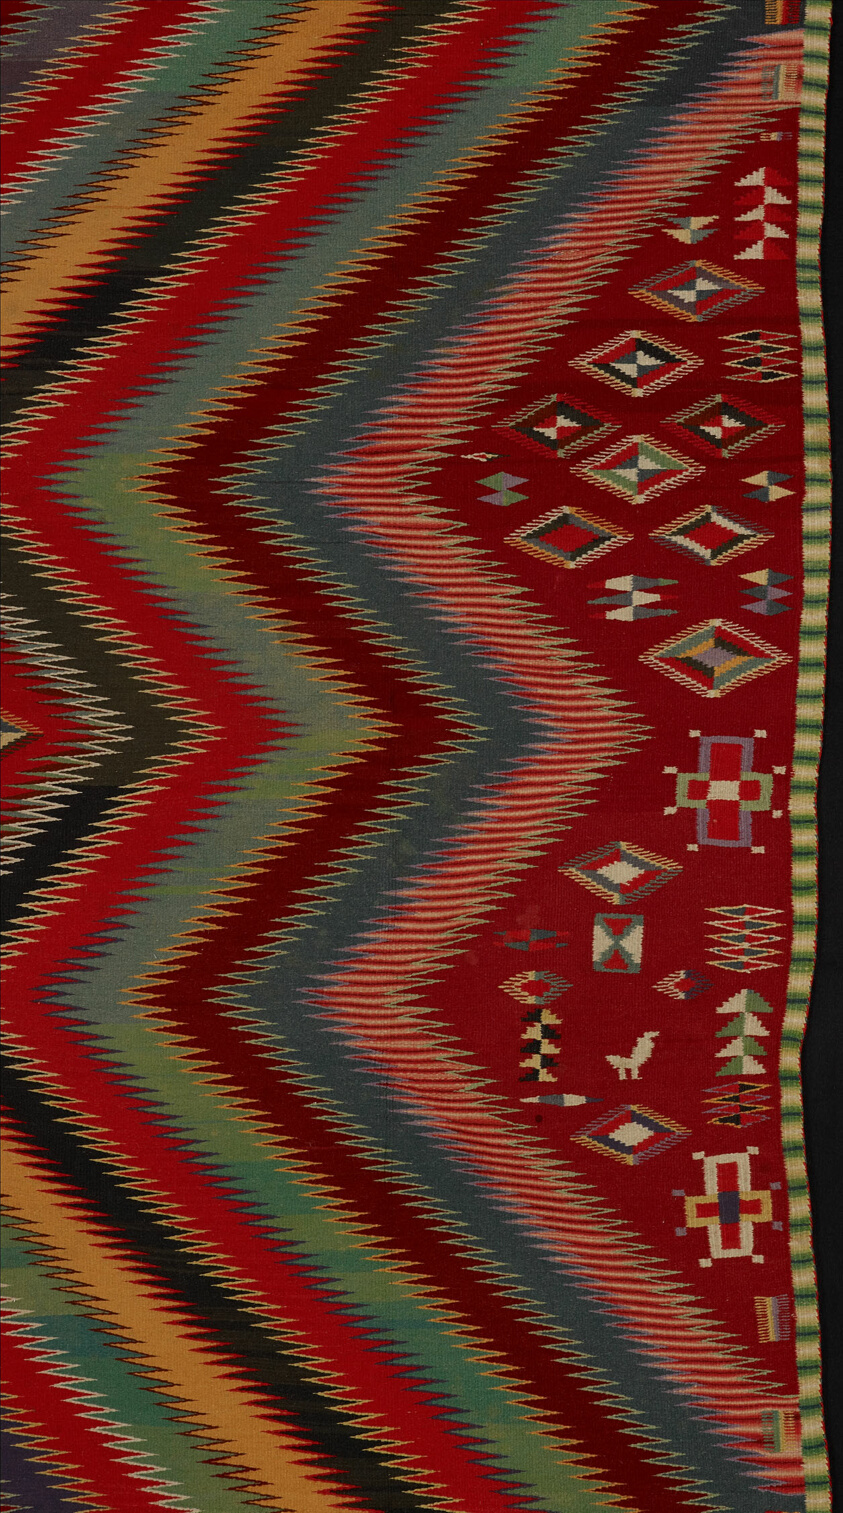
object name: Textile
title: "Eye-Dazzler" Weaving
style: navajo, native american, americas, Folk Art, 19th century, indigenous, north american, native north american, eye-dazzler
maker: Navajo (Diné) (Arizona, New Mexico, and Utah, United States)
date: 1880/1900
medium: Cotton and wool, single interlocking tapestry weave; twined selvages and heading, overcast finish terminating in tassels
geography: Navajo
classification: textile; weaving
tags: geometric, zigzags